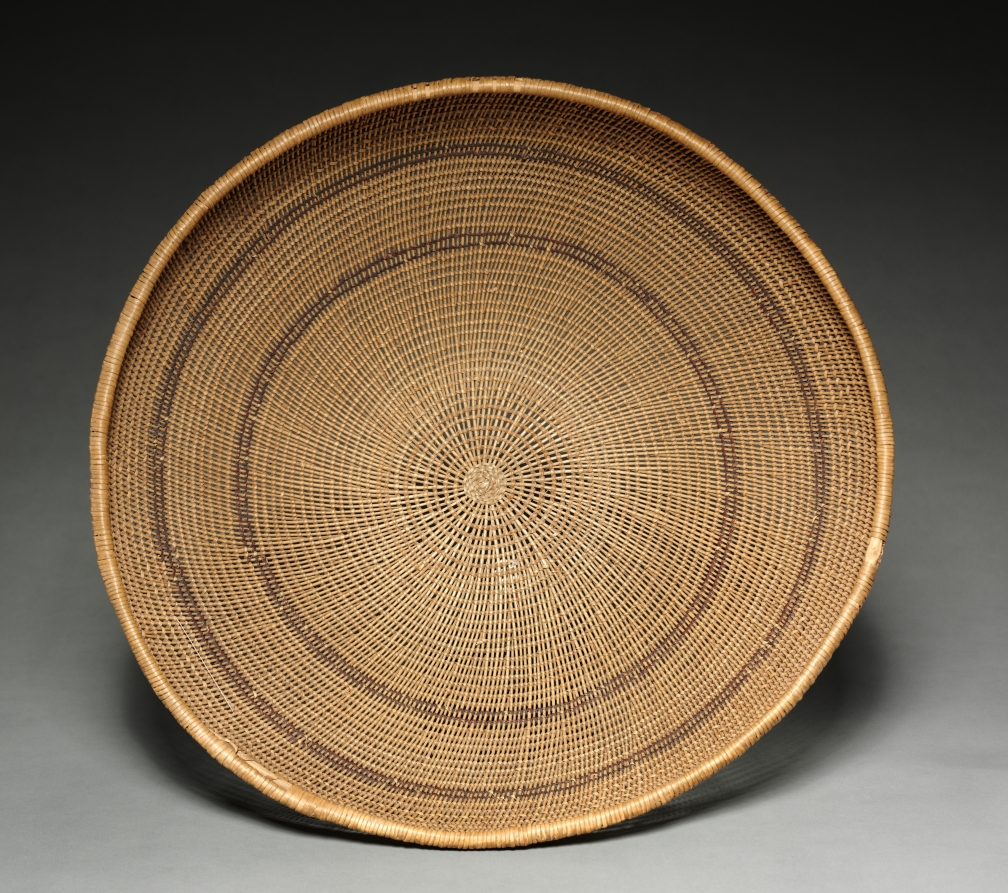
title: Tray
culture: California, Pomo, late 19th- early 20th century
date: 1895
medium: plain twine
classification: Basketry